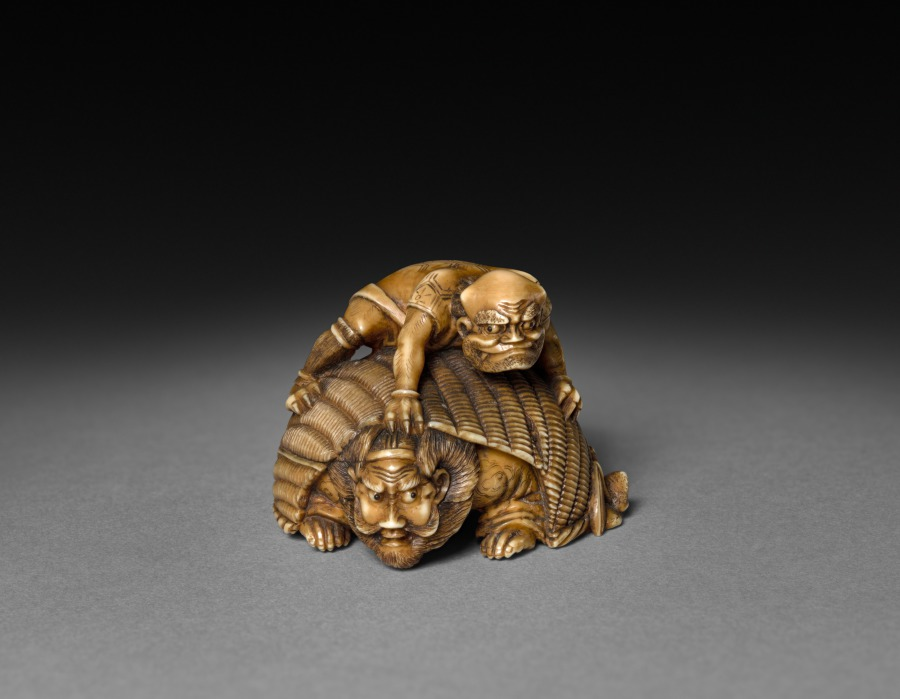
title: Demon Covering Shoki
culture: Japan, Edo period (1615–1868)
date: early to mid-1800s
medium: ivory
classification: Netsuke